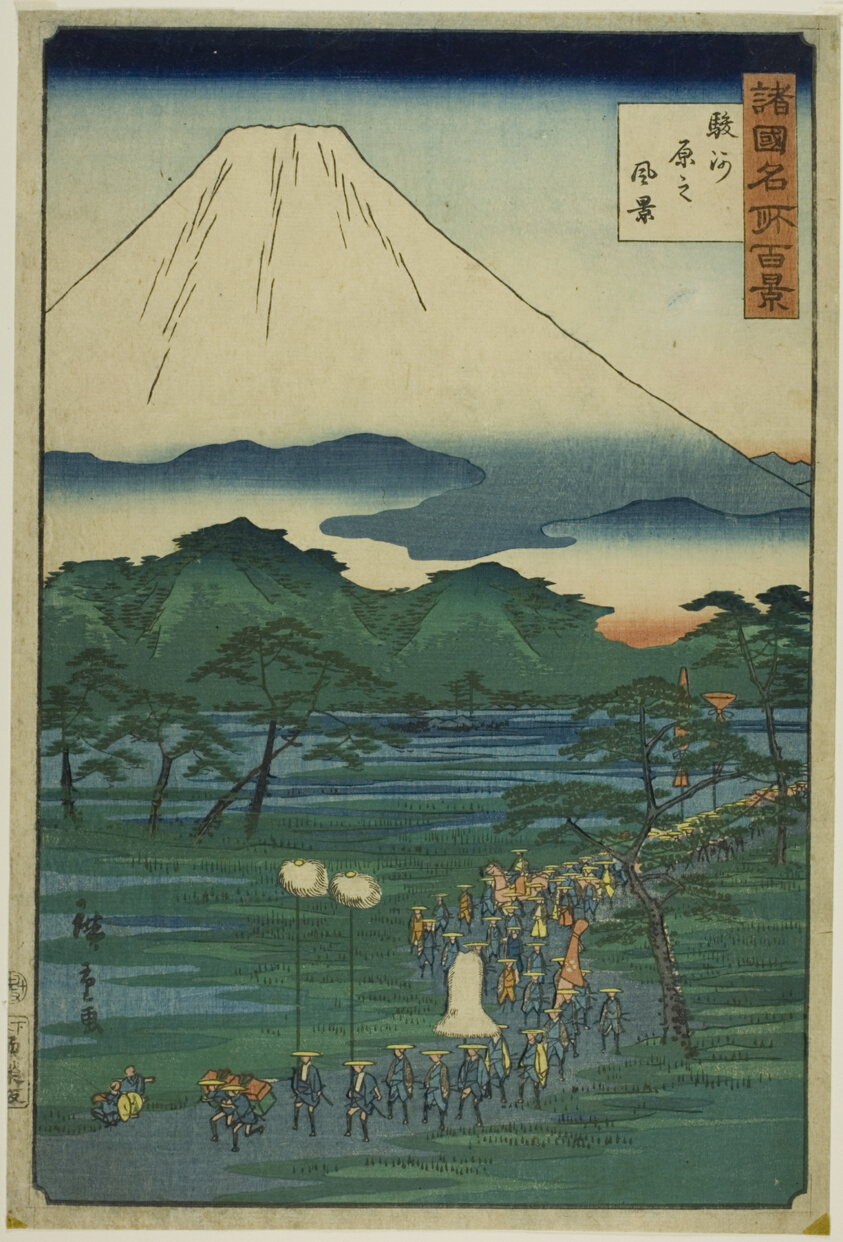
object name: Print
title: Aerial View of Hara, Suruga Province (Suruga haru no fukei), from the series “One Hundred Famous Views in the Various Provinces (Shokoku meisho hyakkei)”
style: Japanese (culture or style)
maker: Utagawa Hiroshige II (Shigenobu) (Japanese, 1826–1869)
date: 1860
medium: Color woodblock print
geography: Japan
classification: woodblock print; print